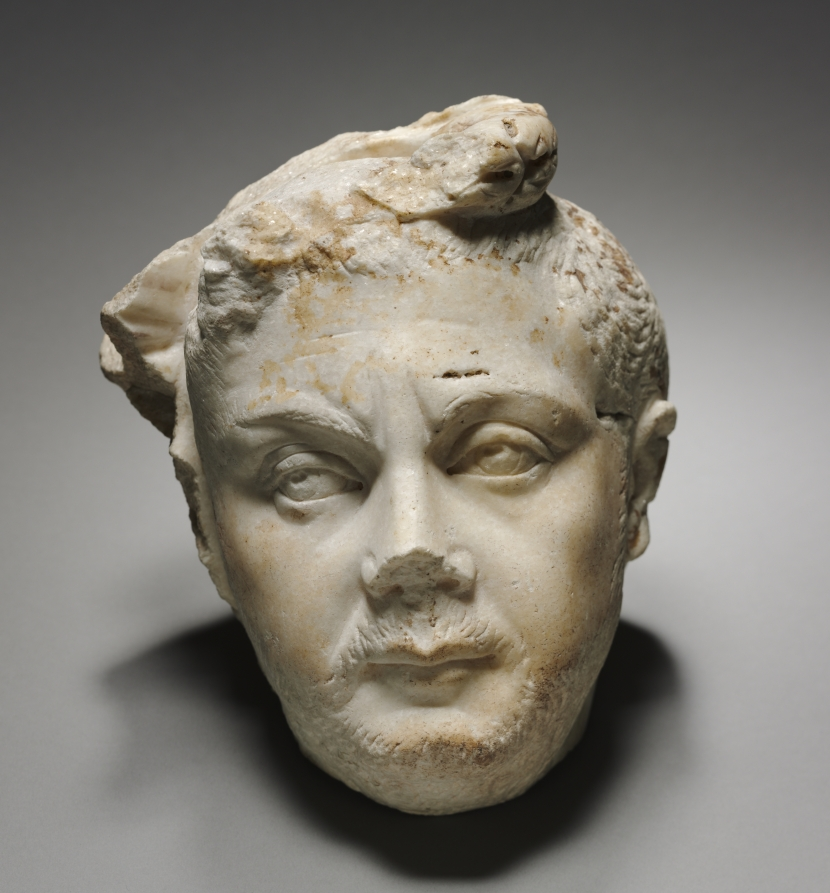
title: Relief Portrait Head of the Emperor Balbinus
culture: Italy, Roman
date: c. 238 CE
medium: marble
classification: Sculpture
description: Wearing a laurel wreath, this head belongs to the little-known Emperor Balbinus, who ruled the empire together with Pupienus for only 99 days in AD 238, the now infamous Year of the Six Emperors. Following his death at the hands of an angry mob, Balbinus and his wife (whose name remains unknown) nevertheless received a large and impressive marble sarcophagus. The couple recline together on the lid, and appear twice in relief on the front, where this head originally belonged. Remarkably, although the head was purchased in Rome in 1925, two years before the sarcophagus was discovered (in many pieces near the Praetextatus Catacombs in Rome), it was found to fit a gap in the larger sculpture in 1966. Since then, a plaster cast of the Cleveland head has remained in place on the original sarcophagus, now in the Vatican Museums.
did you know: Carved in deep relief (not quite in the round), this head comes from a large sarcophagus.